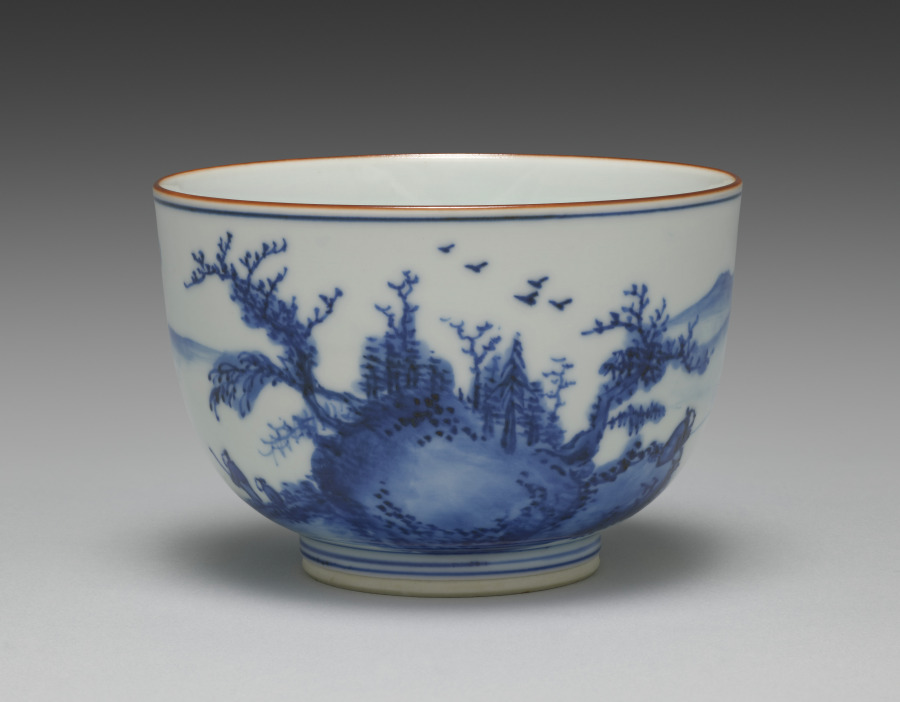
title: Bowl with Chinese Landscape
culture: Japan, Meiji period (1868–1912)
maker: Seifū Yohei III (Japanese, 1851–1914)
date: 1893–1914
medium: porcelain with underglaze blue and overglaze red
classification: Ceramic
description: This bowl has a landscape with figures in blue and iron oxide. The scene is set along a river with mountains in the distance, likely in the Jiangnan region of southern China, famous for compositions of the Eight Views of the Xiao and Xiang Rivers and of West Lake in Hangzhou. There are two people in the foreground: one person fishes along the riverbank across from a rustic hermit’s lodge sited on stilts over the water’s edge; on the other side of the bowl, a person with a tall staff gazes at the full moon, accompanied by his servant. The foot has a double band in blue, while another blue band encircles the bowl just beneath the rim, which is covered in red iron oxide. The inside of the footring is also circled in blue around the impressed mark.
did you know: The flock of geese making its way across the sky and the many bare tree branches suggest the season may be autumn.